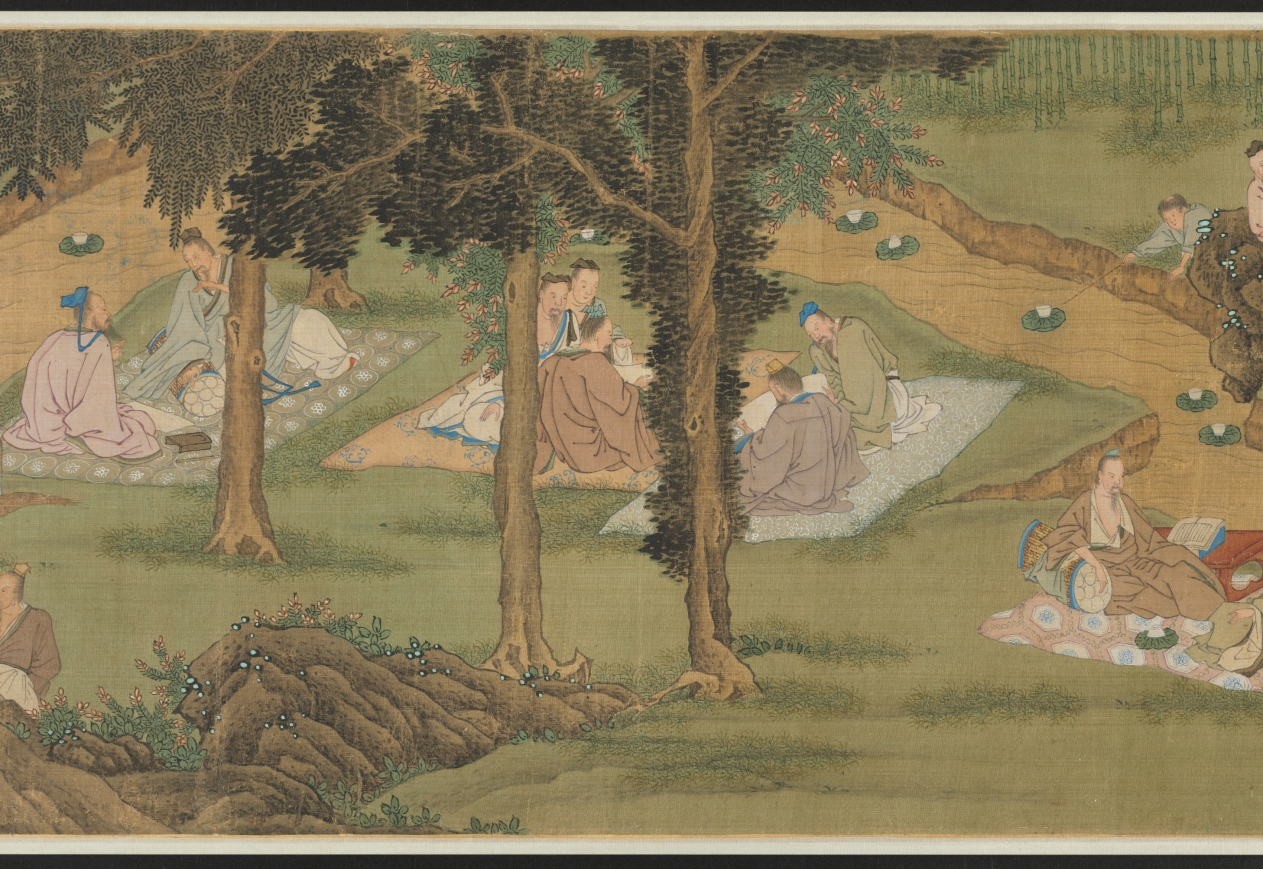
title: Purification at the Orchid Pavilion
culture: China, Qing dynasty (1644-1911)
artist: Fan Yi (Chinese, c. 1615–before 1688)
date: 1671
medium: Handscroll; ink and color on silk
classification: Painting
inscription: Artist's inscription, signature, and 2 seals: Painted by Fan Yi of Zhongfu during the second month of winter of the xinhai year [1671]. [2 seals] Fan Yi zhi yin, Zi yu yi.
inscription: Title on the frontispiece by Monk Yueshan (1629-1709).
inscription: 3 colophons and 13 additional seals: 1 colophon, dated 1707, and 6 seals of Yueshan; 2 colophons and 3 seals of Wong Kwan-Shut (Huang Junshi) 黃君實 (b. 1934); 2 seals of Fu Shen 傅 申 (b. 1937); 2 seals of Tessai Tomioka 富岡鐵齋 (1836-1924).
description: By the 1600s, the historic gathering at Lanting, Zhejiang province, in 353 CE was a common theme in Chinese painting. Originally based on a composition attributed to Li Gonglin (1049– 1106), now lost, Wu school artists revived the theme. Fan Yi, the brother of the artist Fan Qi from Nanjing, used delicate brushwork and luminous colors to depict the spring gathering.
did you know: The gathering’s host is in the Orchid Pavilion at the end of the scroll, representing an episode known as “Wang Xizhi Watching the Geese 王羲之觀鵝圖.”